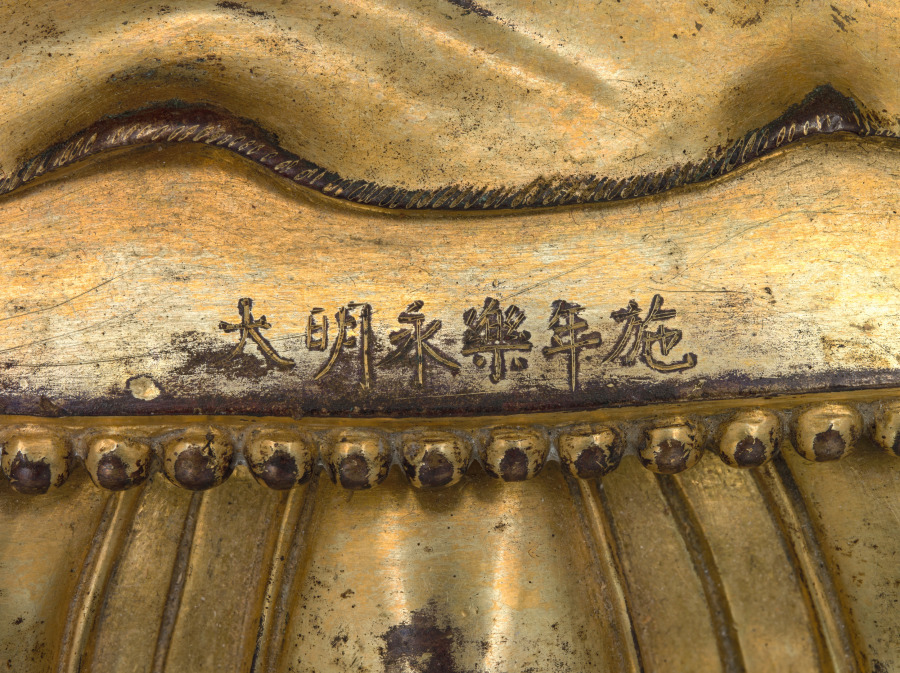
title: Virupa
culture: China, Ming dynasty (1368-1644), Yongle reign (1403-1424)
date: early 1400s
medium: Gilt bronze with silver, stones, and pigment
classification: Sculpture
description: Virupa is one of the great teachers in the history of tantric Buddhism. His posture references his ability to stop the sun; as an enlightened being, he can control phenomena of nature. As a tantric practitioner, he overturns ordinary assumptions about proper behavior, so he overeats, drinks large quantities of liquor, and waits for the king to pay his bill at the tavern. At the edge of the lotus pedestal is an inscription identifying the image as having been made in the imperial kilns of the third emperor of the Ming dynasty in China as a gift to a Tibetan monastic leader. While closely linked to Tibetan styles, the luxurious detailing, special gilding process, and the casting of the ornaments onto the body without use of inlay are specifically Chinese characteristics.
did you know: Virupa's clothing and jewelry are embellished with silver and stones, while pigments enhance his hair and eyes.